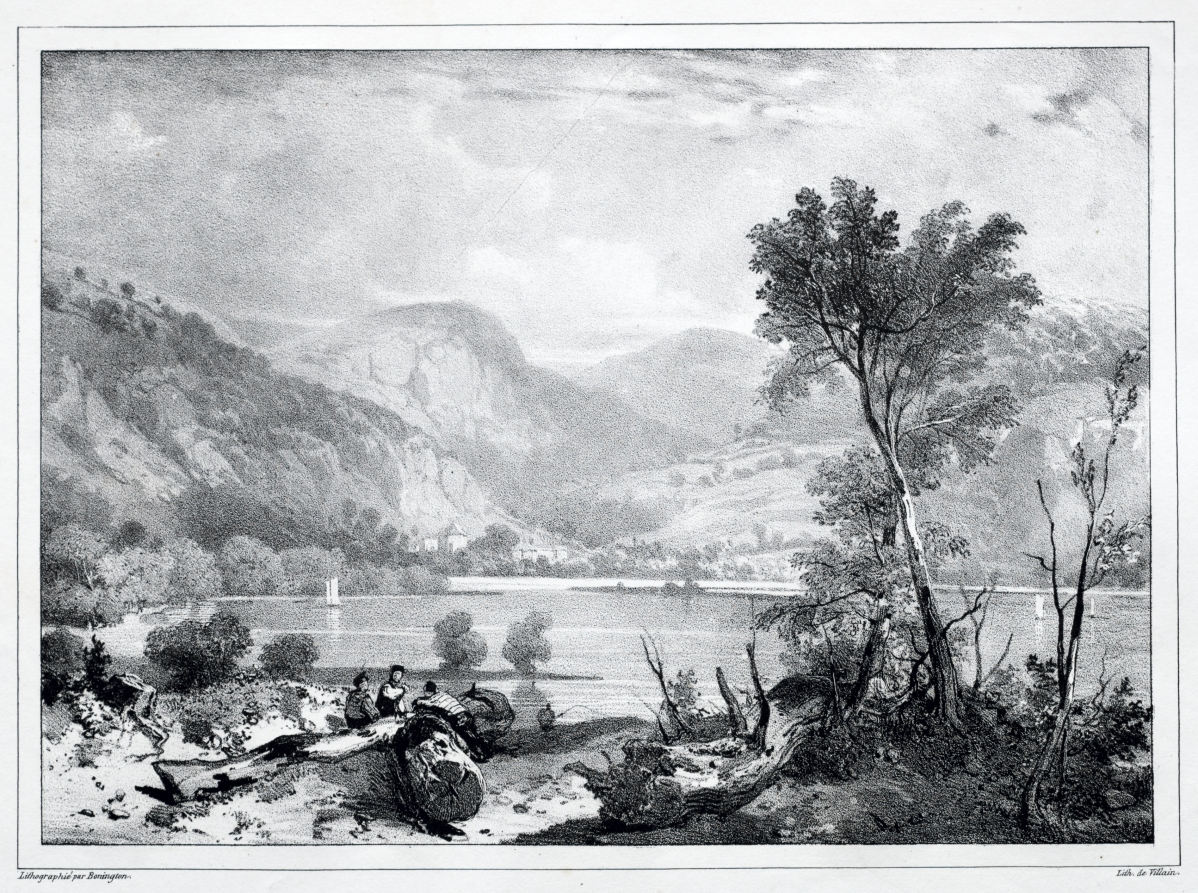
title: Lochkillin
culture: England, 19th century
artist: Richard Parkes Bonington (British, 1802–1828)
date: 1826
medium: lithograph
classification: Print